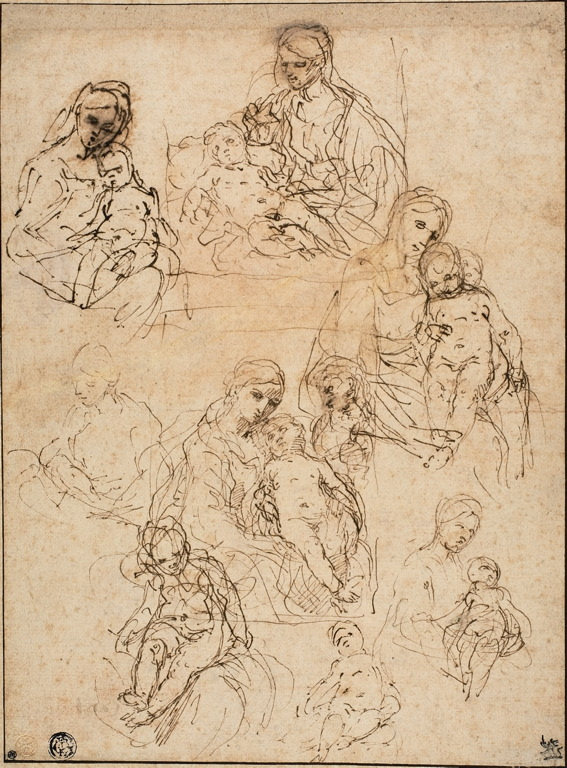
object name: Drawing and Watercolor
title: Sketches of the Virgin and Child, and the Holy Family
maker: Simone Cantarini (Italian, 1612-1648)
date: 1642/48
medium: Pen and brown ink on buff laid paper, laid down on cream board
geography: Italy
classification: pen and ink drawings; drawings (visual works); prints and drawing